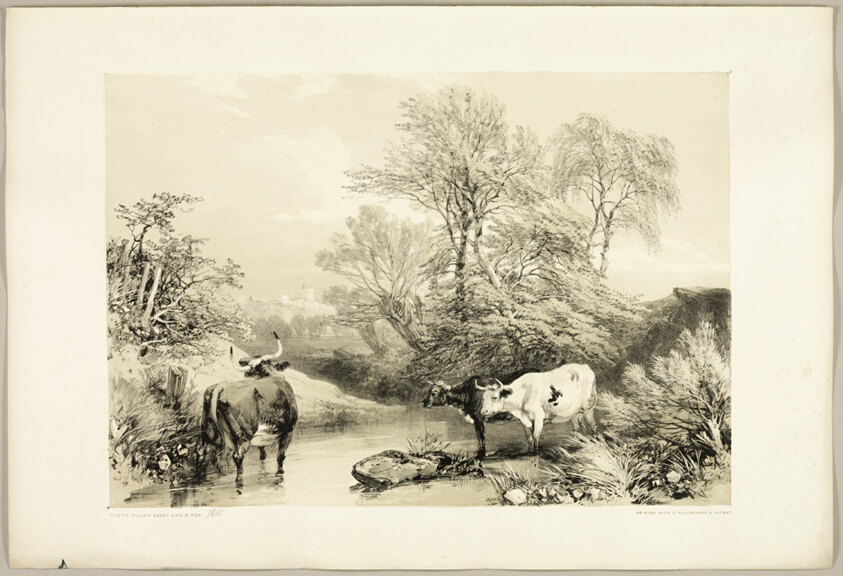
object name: Print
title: Thorn, Willow, Beech and Birch, from The Park and the Forest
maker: James Duffield Harding (English, 1798-1863); printed by Charles Joseph Hullmandel (English, 1789–1850); published by Thomas McLean (English, 1788–1875)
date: 1841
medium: Lithograph in black, with gray tint from a second plate, on ivory wove paper, laid down on ivory wove paper (chine collé)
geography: England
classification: lithograph; print; prints and drawing